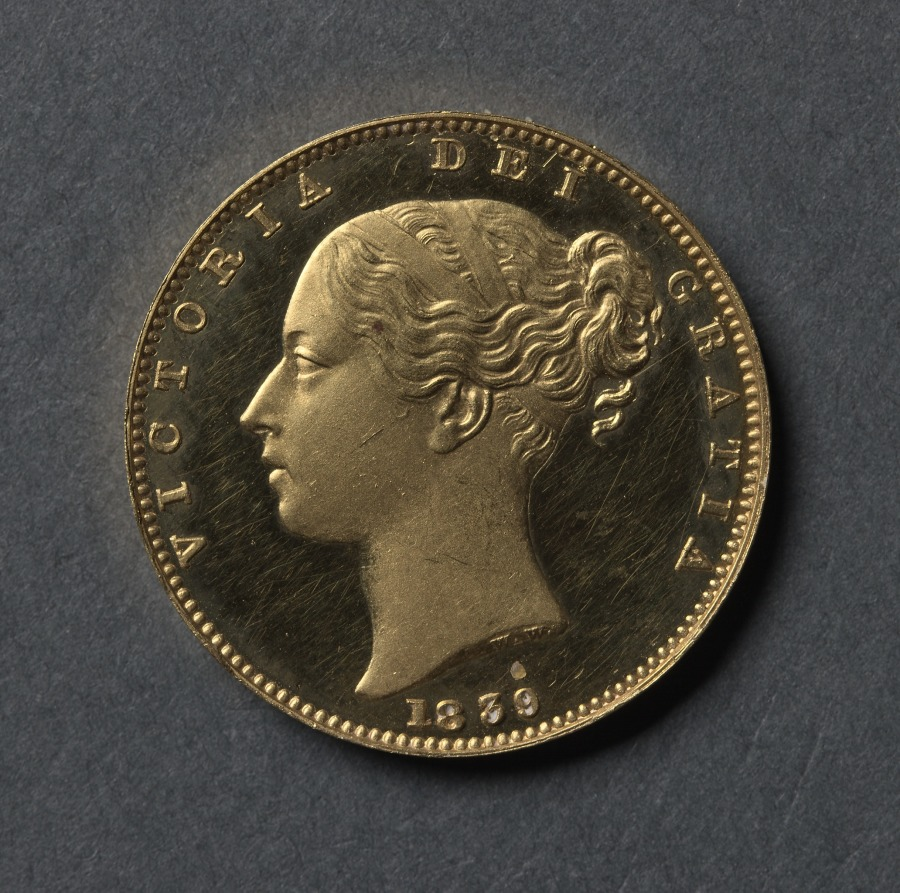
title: Sovereign: Victoria (obverse); Shield of Arms (reverse)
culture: England, Victoria, 1837-1901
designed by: William Wyon (British, 1795–1851)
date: 1839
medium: gold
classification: Coins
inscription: VICTORIA DEI GRATIA; below: 1839.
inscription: BRITANNIARUM REGINA FLD DEF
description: With the end of the rule of the House of Hanover, whose last direct representative on the British throne was William IV (died 1837), the royal arms that had ceased to show the French pretention at the end of the first coinage of George III were now further simplified. In each quarter from top right to bottom left: 1. England; 2. Scotland; 3. Ireland; 4. England.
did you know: William Wyon was the official chief engraver at the Royal Mint from 1828 until his death.